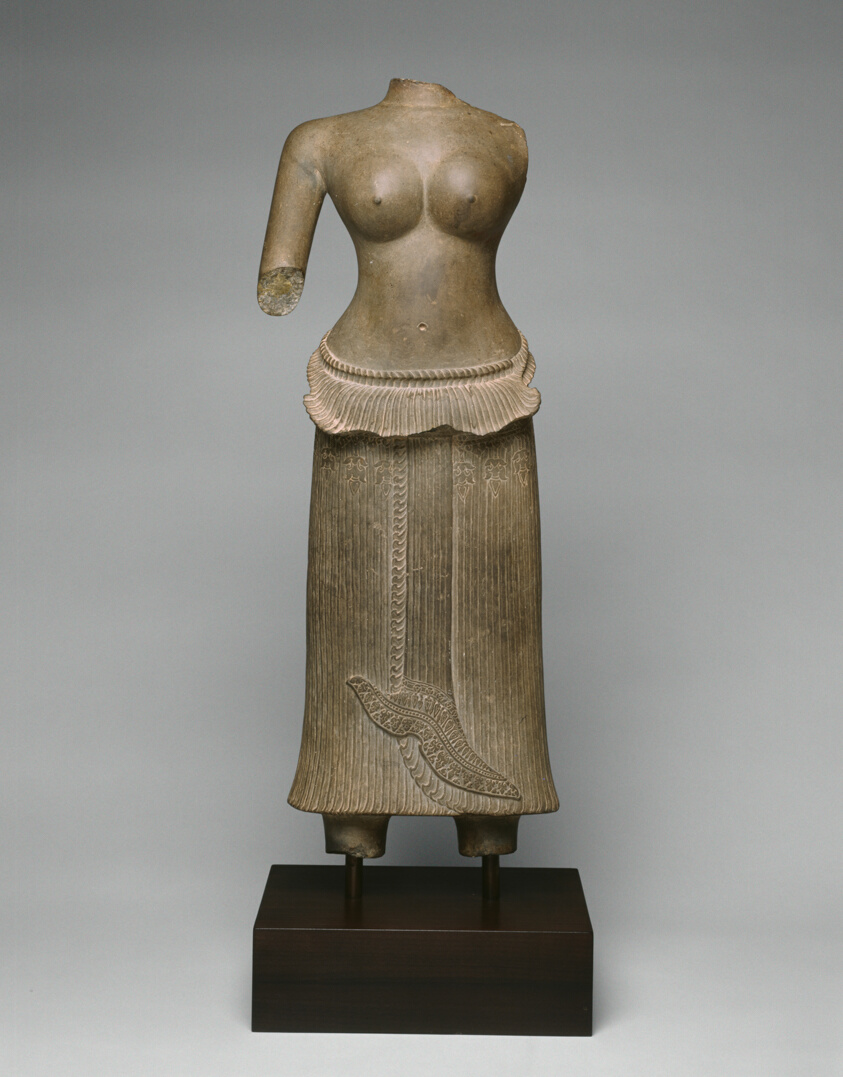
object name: Sculpture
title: A Goddess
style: Southeast Asian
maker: Cambodia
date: Angkor period, 12th century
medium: Sandstone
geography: Cambodia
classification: sandstone; stone; sculpture; asian art